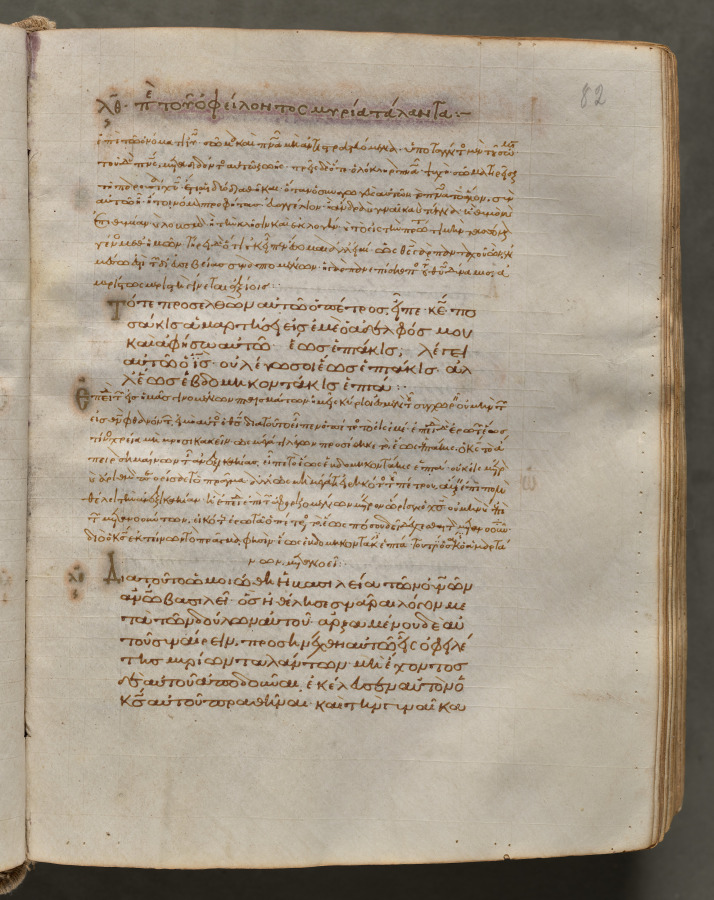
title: Text, folio 82 (recto), from a Gospel Book with Commentaries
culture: Byzantium, Constantinople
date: c. 1000–1100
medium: ink, tempera, and gold on vellum; leather binding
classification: Bound Volume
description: Each of the four gospels in this book opens on a page with brilliantly illuminated borders depicting the author of the text as well as birds-principally peacocks, symbols of the immortality of the soul-and fountains, representing the fountain of life and the salvation of the soul. This volume consists of 428 leaves with texts in Greek. Its level of sophistication suggests that it was probably written and decorated in a monastery in Constantinople.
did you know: Gospel Books were carried in procession through Byzantine churches.